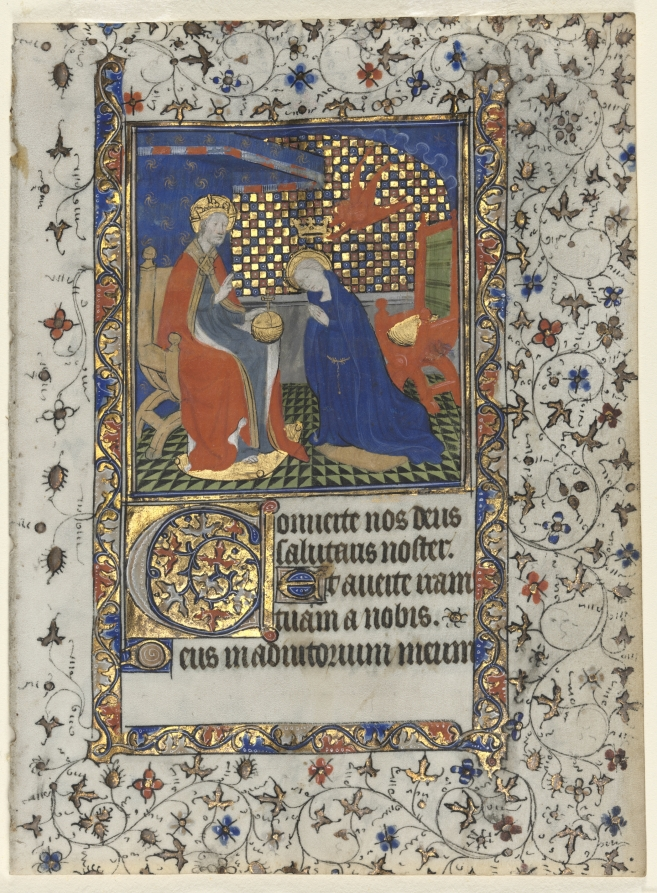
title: Bifolio from a Book of Hours: Coronation of the Virgin (recto); Text (verso)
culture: France, Paris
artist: workshop of Boucicaut Master (French, Paris, active about 1410–25)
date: c. 1415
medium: ink, tempera, and gold on vellum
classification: Manuscript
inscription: Converte nos, Deus salutaris noster, et averte iram tuam a nobis Deus in adiutorium meum…[intende]